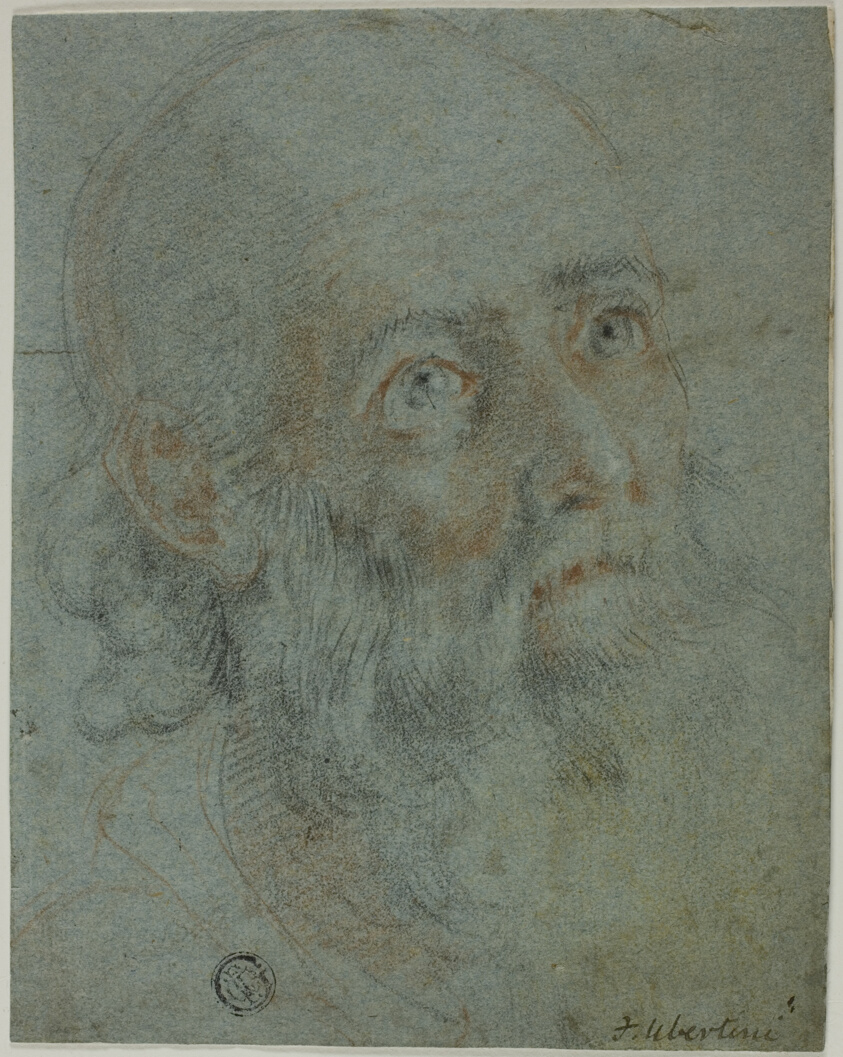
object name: Drawing and Watercolor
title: Head of a Bearded Man, Looking Up to Right: Study for Saint Catherine of Alexandria Disputing with the Pagan Priests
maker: Ludovico Cardi, called Il Cigoli (Italian, 1559-161; or follower of Federico Barocci (Italian, c. 1535-1612)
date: c. 1603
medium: Red and black chalk, heightened with touches of white chalk, on blue laid paper, laid down on cream laid card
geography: Italy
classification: chalk; drawings (visual works); prints and drawing